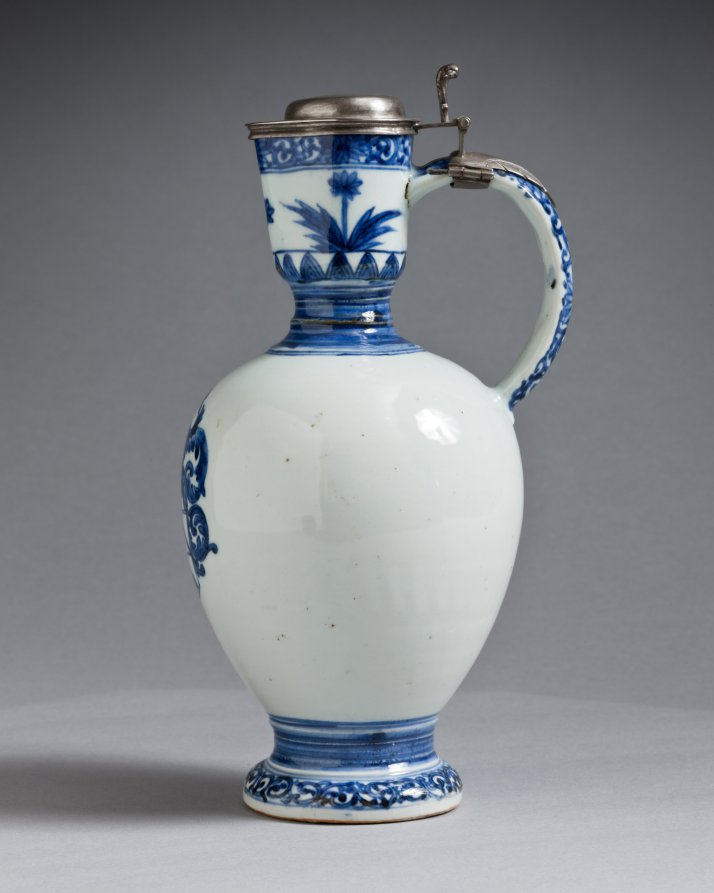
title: Jug with Silver Mounts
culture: Japan, Edo period (1615–1868)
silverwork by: Barent van Leeuwen (Dutch, 1637–1682)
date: c. 1662–76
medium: porcelain with underglaze blue decoration and silver mounts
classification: Ceramic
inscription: [on silver]: town mark for Amsterdam; lion rampant crowned (alloy mark for 0-934 silver); d (date letter for 1666), maker's mark of Barent van Leeuwen.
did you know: The coat of arms on this jug are those of the Valckenier family, active in the Dutch East India Company.